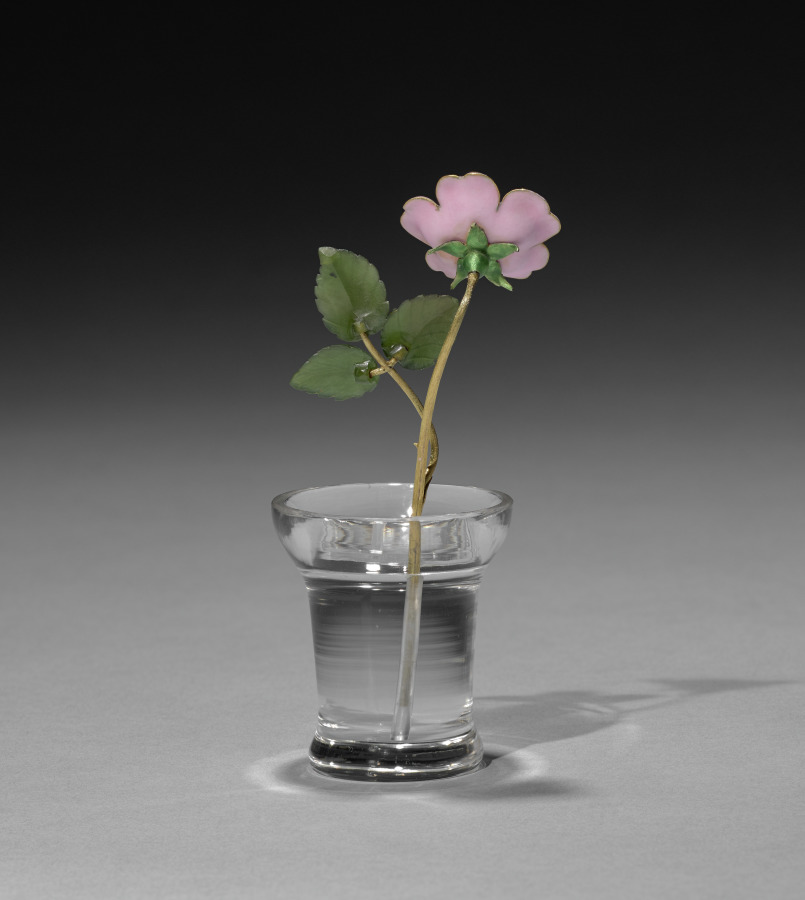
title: Flower Study of a Wild Rose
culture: Russia, St. Petersburg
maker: House of Fabergé (Russian, 1842–1918)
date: c. 1885–1915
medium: gold, silver, enamel, diamond, jade, rock crystal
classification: Miscellaneous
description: This delicate flower study resembles a stem of wild rose. Fabergé’s inspiration for his flower studies is said to have come from the floral brooches of precious stones that were made in the 1700s for Catherine the Great as well as from the Japanese art of flower arranging, known as ikebana. Small and delicate, Fabergé’s flower studies were given as intimate gifts to friends by the tsarina and others in the court. She also liked to take them around to wherever the imperial family was residing as a reminder of spring during the harsh Russian winters.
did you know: The stems of Fabergé’s flower studies are set into little basins carved from rock crystal to resemble pots of water.